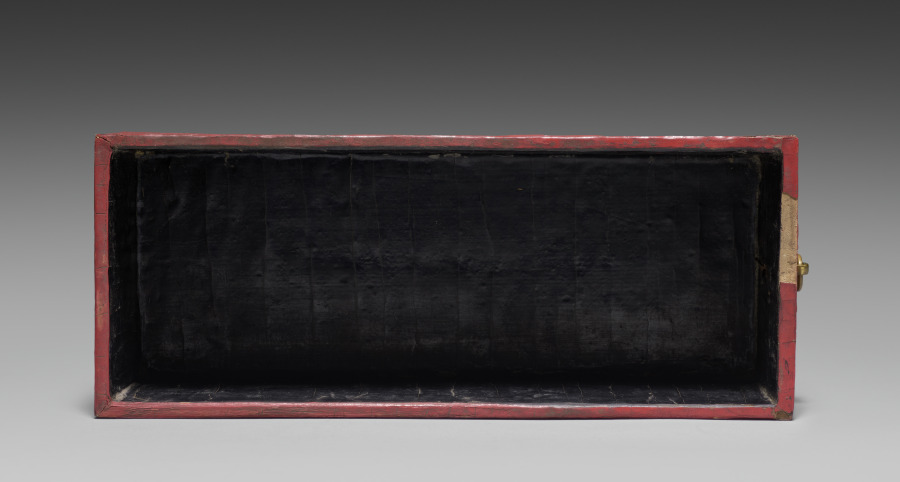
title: Drawer for a Tihong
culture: China, Ming dynasty (1368-1644), Wanli reign (1572-1620)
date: 1585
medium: carved cinnabar lacquer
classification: Lacquer